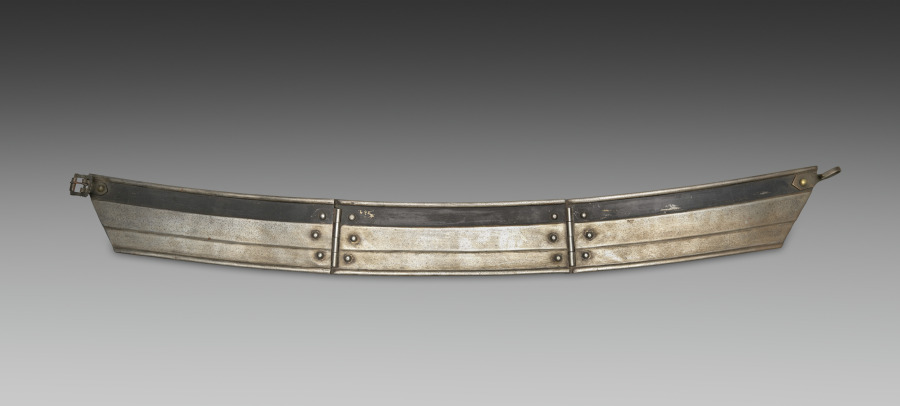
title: Armored Horse's Rein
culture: Germany, 19th century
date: 1801–1900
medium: steel with black paint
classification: Arms and Armor